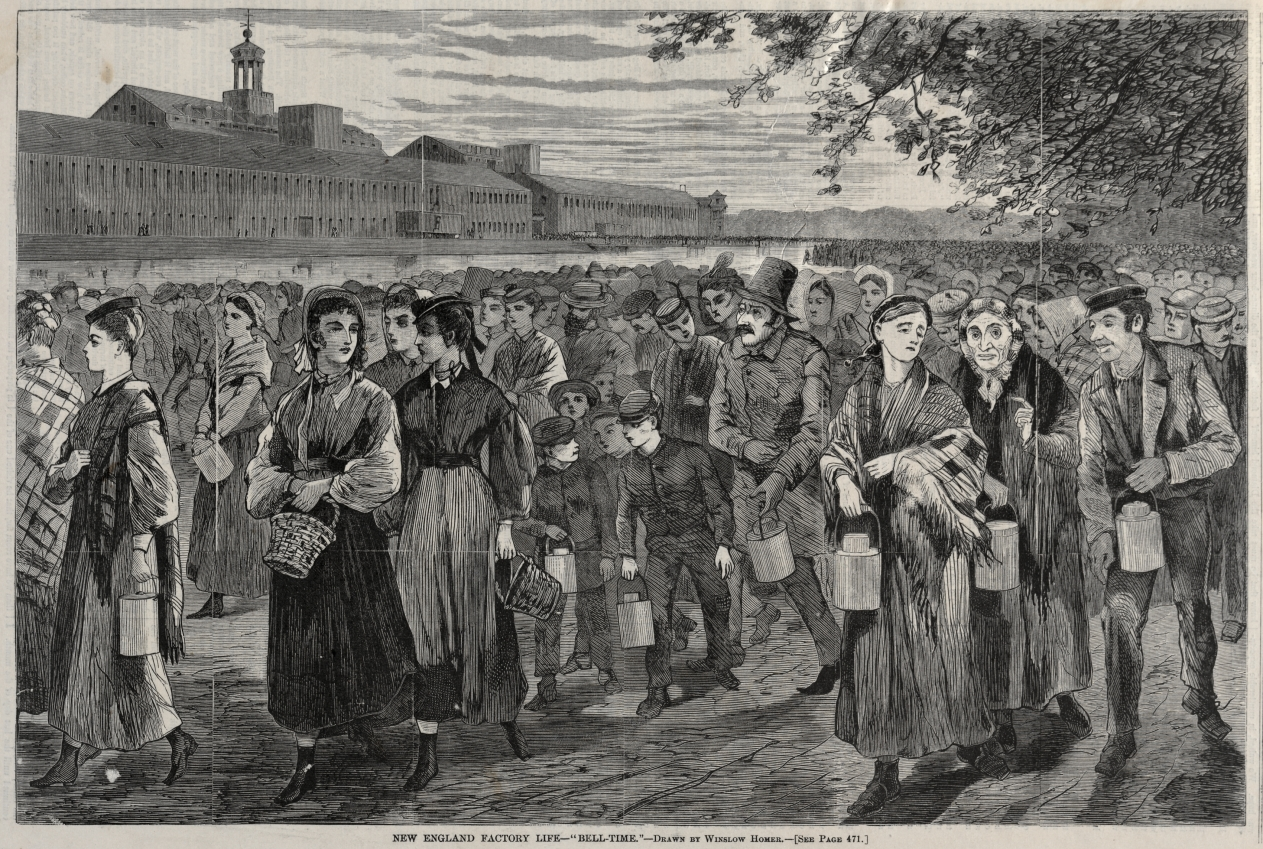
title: New England Factory Life - "Bell-Time"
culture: America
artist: Winslow Homer (American, 1836–1910)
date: 1868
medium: wood engraving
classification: Print